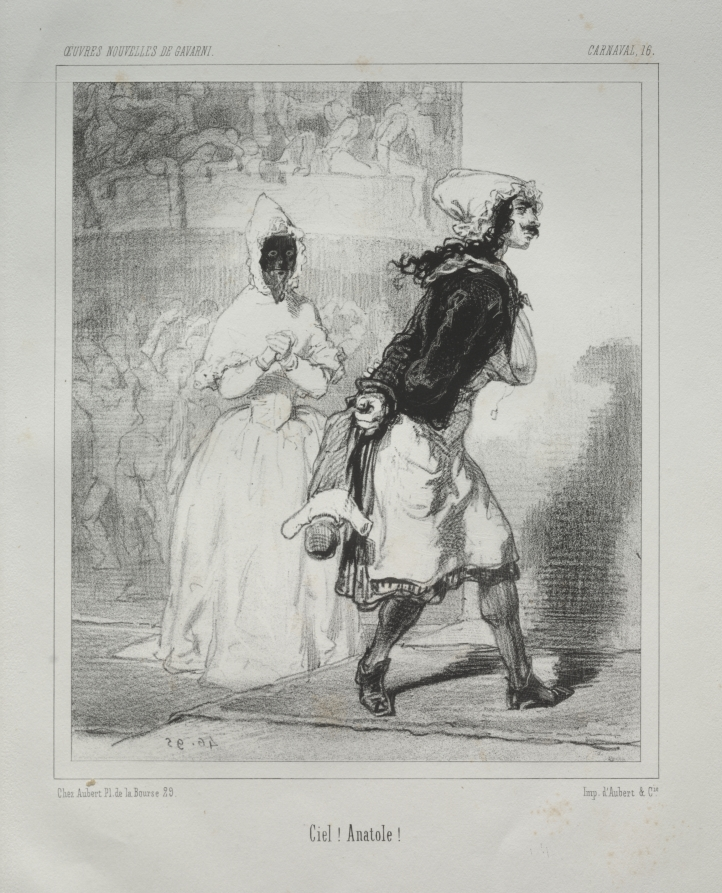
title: Carnaval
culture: France, 19th century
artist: Paul Gavarni (French, 1804–1866)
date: c. 1841–47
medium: lithograph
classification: Print